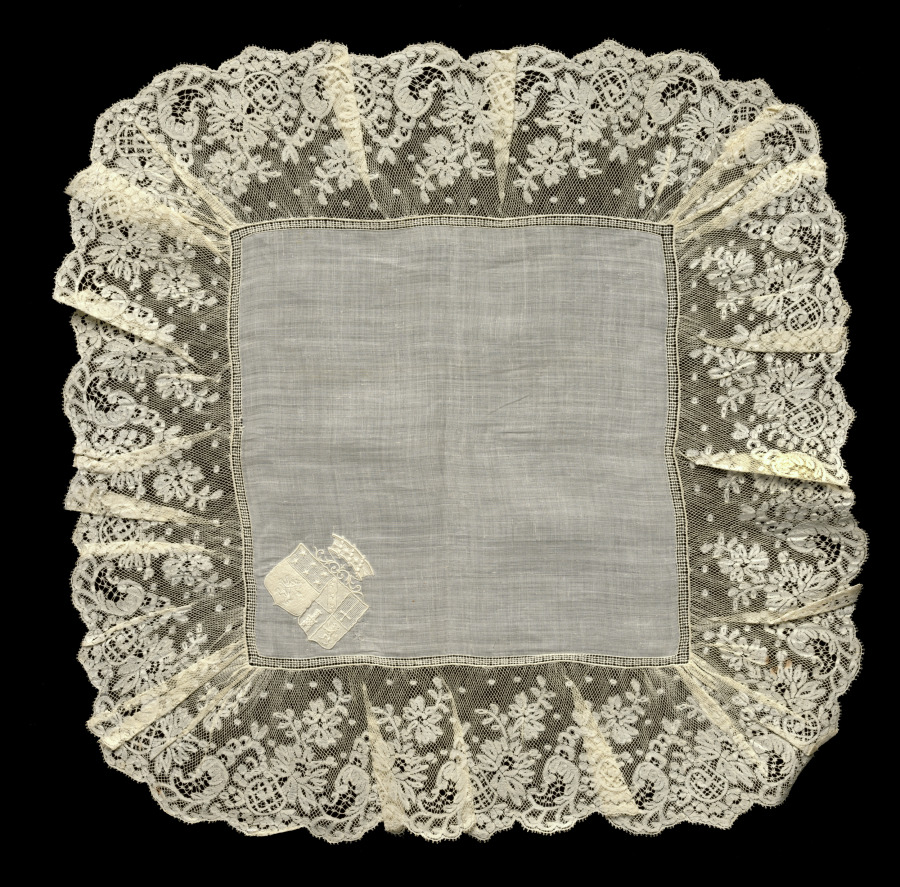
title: Lace Handkerchief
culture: France, Valenciennes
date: 1800s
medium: Plain weave linen center with bobbin lace (Valenciennes) edging and embroidery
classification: Lace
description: This handkerchief has a coat of arms embroidered in white in one corner.